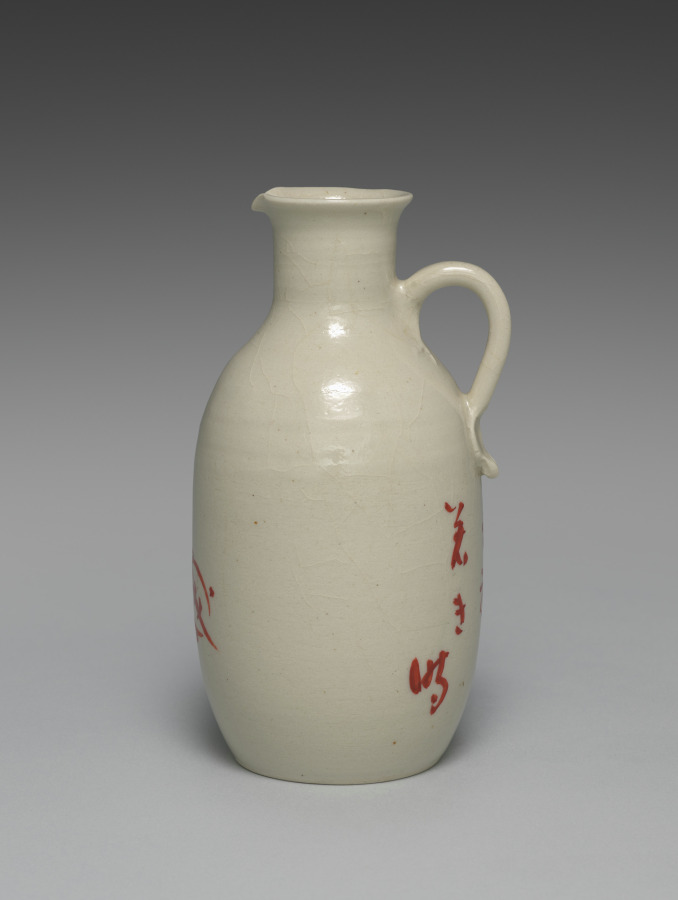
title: Tortoises Sake Pourer from Sake Pourers with Crane and Tortoises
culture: Japan, Meiji period (1868–1912)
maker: Seifū Yohei III (Japanese, 1851–1914)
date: 1893–1914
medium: One of a pair of sake flasks; porcelain with overglaze color enamel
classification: Ceramic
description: This flask has stencil-like paintings of three turtles—a young one with its parents—while the other in this pair has a crane with a leg raised. Cranes and turtles are well-recognized symbols of longevity in East Asia, with the turtle said to live for ten thousand years and the crane for one thousand. Each flask also has a poem on the back, one in Chinese and the other in Japanese. The latter, which appears on the turtle flask, reads kame iwaku kamiyo wa, ore no wakaki toki. The seventeen syllable poem begins with “turtle” and ends with “when I was young.” It can be translated as, “the turtle said the world of the gods began when I was young.”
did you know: This pair of seemingly humble sake pourers celebrate longevity and delight in a literary tradition that embraces multiple forms of poetic expression.